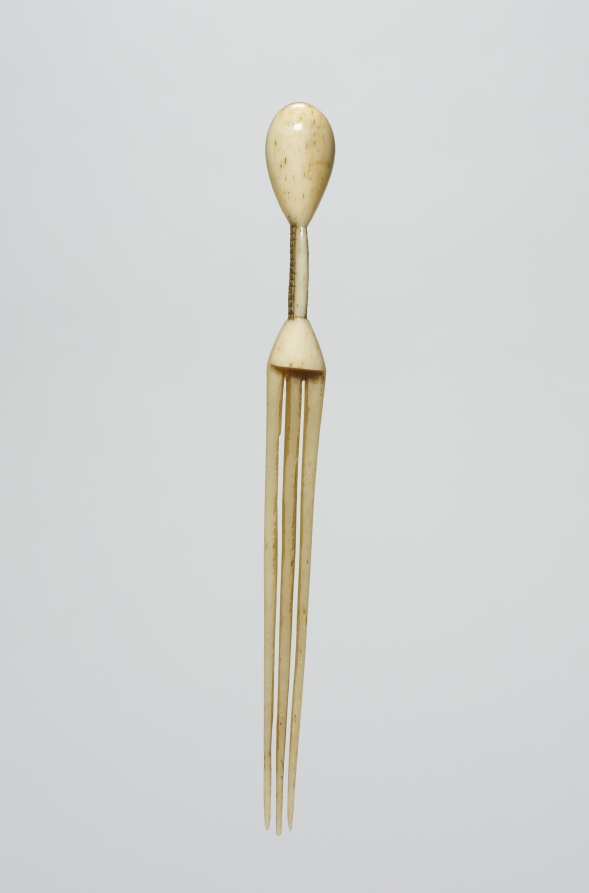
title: Snuff Spoon/Comb (intshengula or izintshengula)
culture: Africa, Southern Africa, South Africa, Zulu-style maker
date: late 1800s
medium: Bone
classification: Sculpture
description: Often, snuff spoons made from the rib of an ox or cow were subtly carved to suggest a female body. Decorated with incised designs blackened with cattle fat and ash, many are true hybrid objects, combining a spoon with a long-tined comb or hairpin. Such spoons were typically worn as ornaments in the hair or even the beard, thus signaling the social standing of their wearer.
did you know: Such spoons were typically worn as ornaments in the hair or even the beard, signaling the social standing of their wearer.